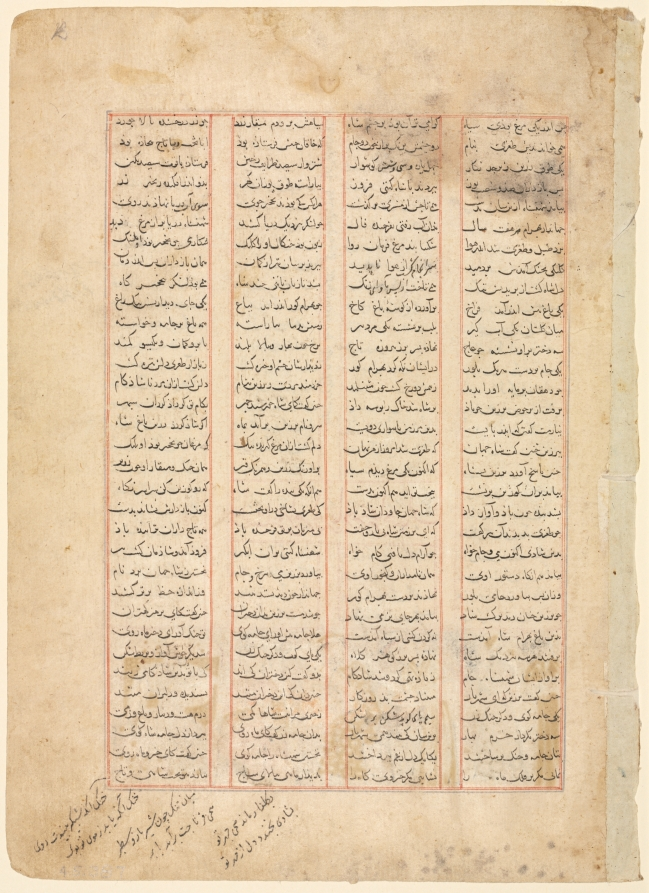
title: Text Page, Persian Verses (recto) from the Shahnama of Firdawsi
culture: Iran, Shiraz, Inju Period, 14th Century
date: c. 1350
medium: ink and opaque watercolor on paper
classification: Manuscript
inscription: script: Naskh